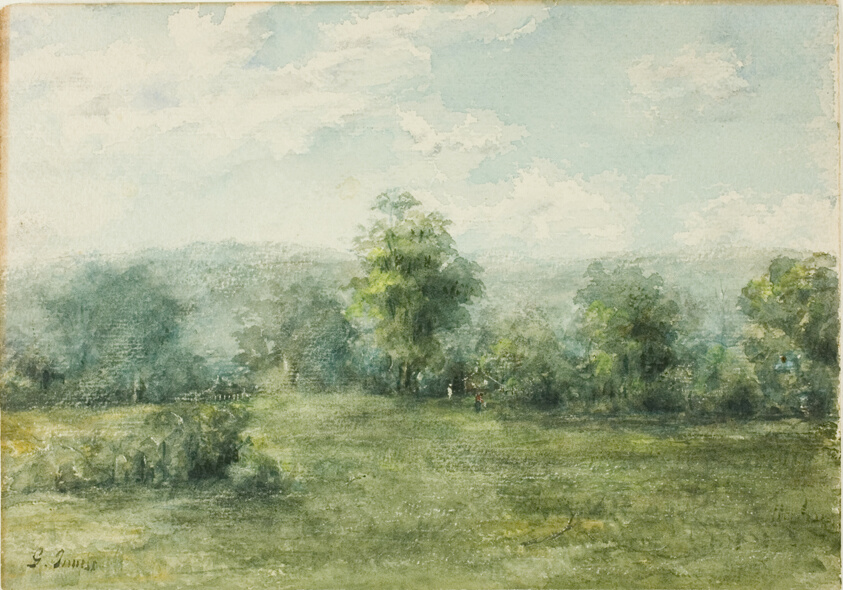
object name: Drawing and Watercolor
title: Landscape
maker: Attributed to George Inness; American, 1825-1894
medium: Watercolor with scraping on ivory wove paper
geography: United States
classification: watercolor; drawings (visual works); prints and drawing